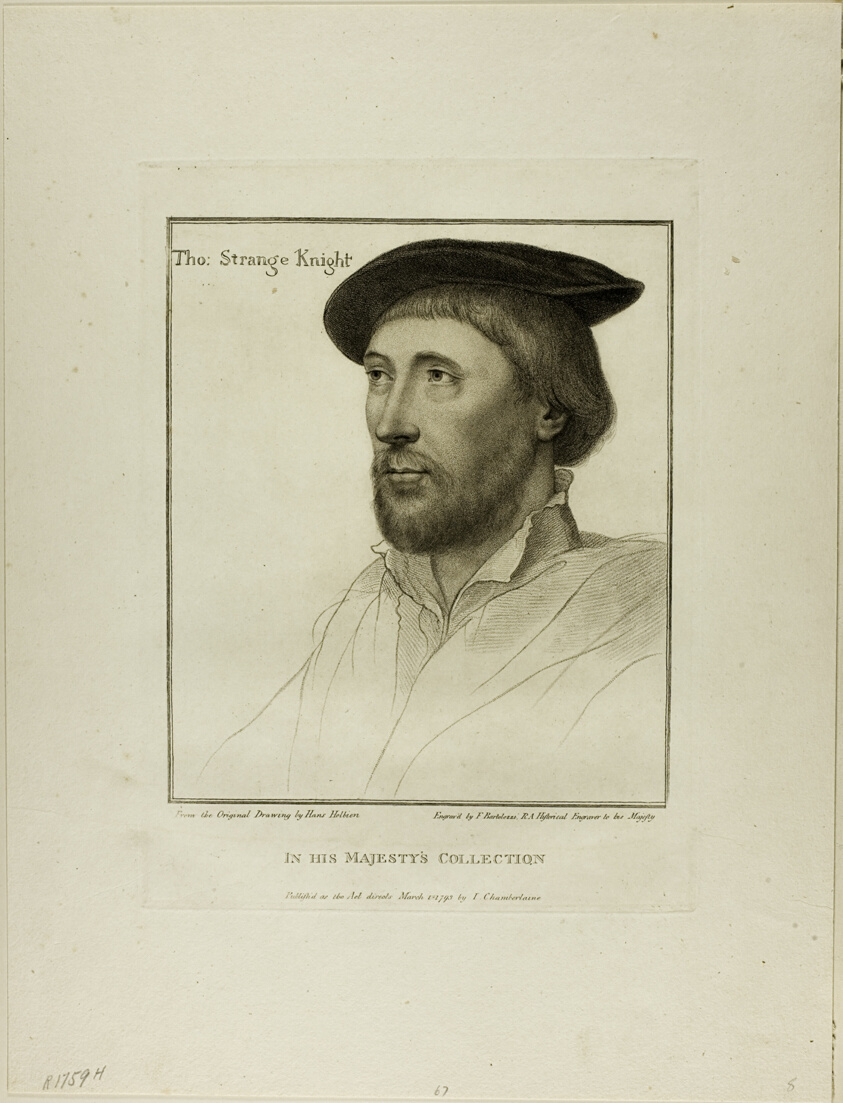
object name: Print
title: Sir Thomas Strange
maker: Francesco Bartolozzi (Italian, 1727-1815); after Hans Holbein the younger (German, 1497-1543)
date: March 1, 1793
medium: Stipple engraving on cream wove paper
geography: Italy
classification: engraving; print; prints and drawing